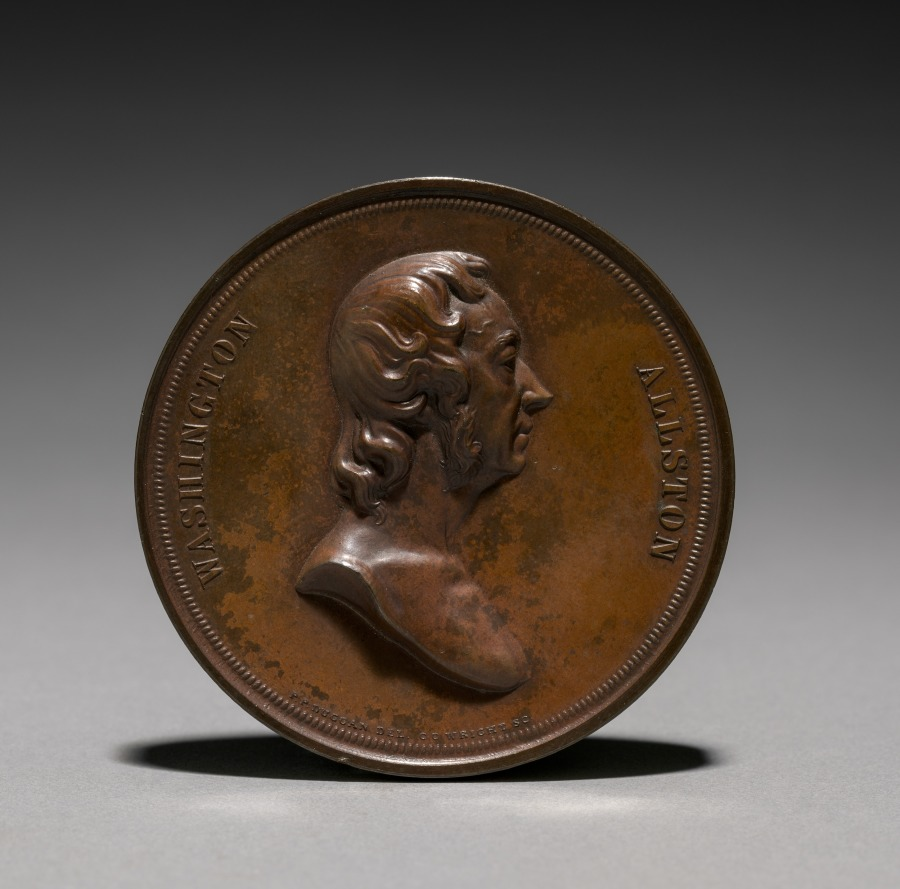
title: Washington Allston Medal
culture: America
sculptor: Charles Cushing Wright (American, 1853)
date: 1847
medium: bronze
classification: Metalwork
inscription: "WASHINGTON ALLSTON."